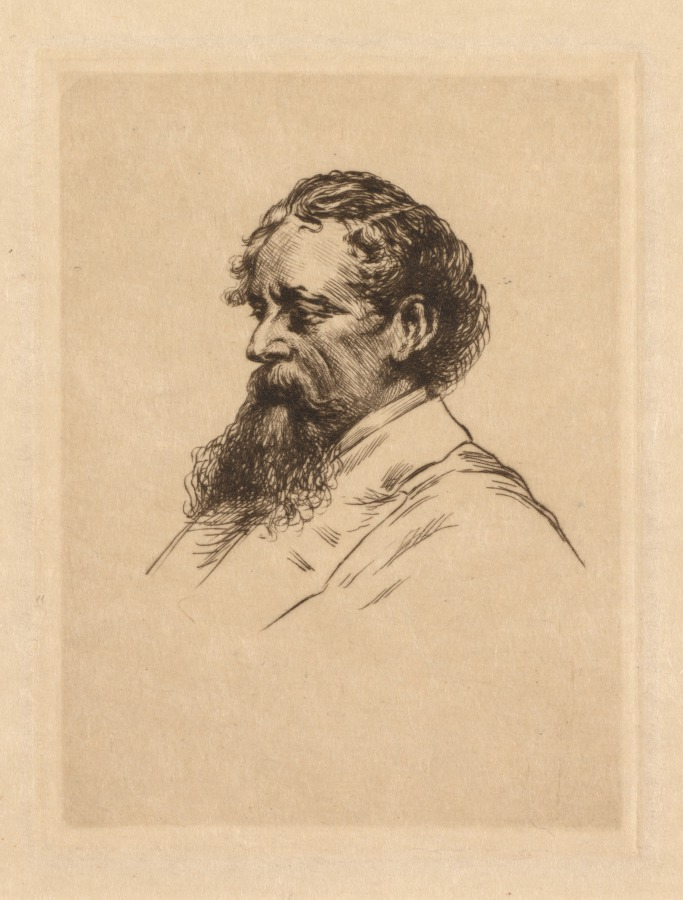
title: Portrait of Charles Dickens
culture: France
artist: Georges Gorvel (French, 1866–1938)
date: c. 1929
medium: Drypoint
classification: Print